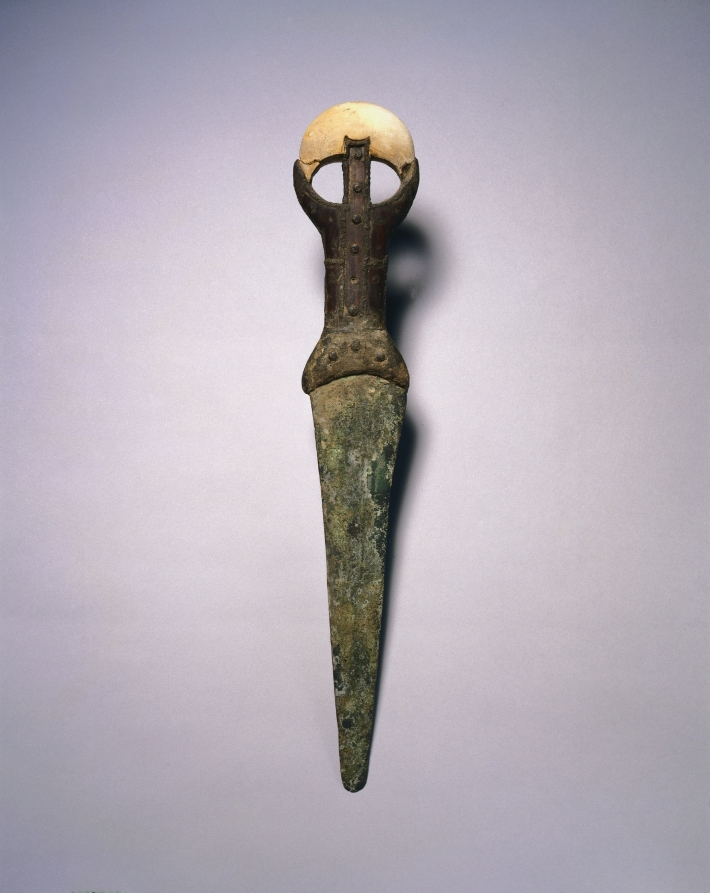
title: Dagger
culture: Egypt, Middle Kingdom (2040–1648 BCE), Dynasties 12–13 or later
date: 1980–1648 BCE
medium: bronze blade with handle of wood, and copper alloy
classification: Implements